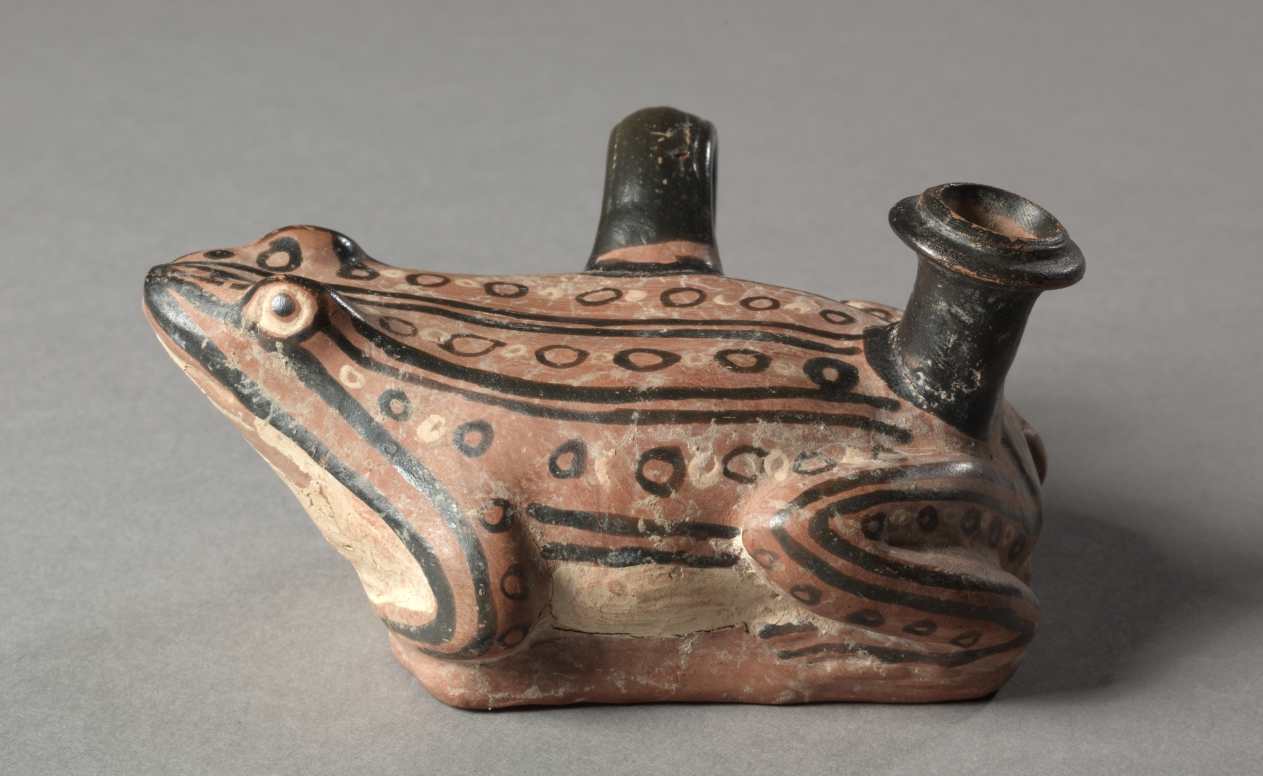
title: Frog-Shaped Guttus (Oil Flask)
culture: South Italian, Apulian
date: 300s BCE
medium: ceramic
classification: Ceramic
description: Guttus is a Latin word referring to a small vessel with vertical spout and ring handle, probably used for pouring small amounts of precious liquids. Often, mold-made ceramic gutti take the form of animals, with realistic painted decoration. Here, the lifelike frog features black stripes and alternating black and white circles.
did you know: The philosopher Plato famously compared the Greeks living along Mediterranean coastlines to “frogs around a pond.”